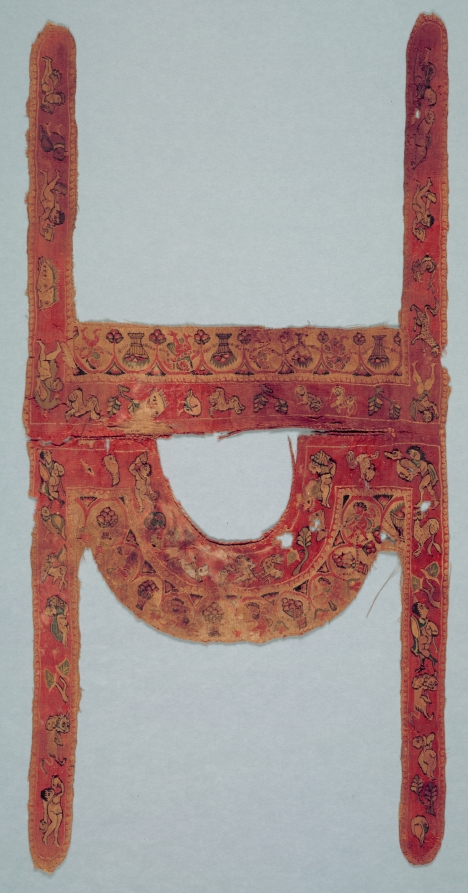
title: Fragment from a Child's Tunic: Neck Opening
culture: Egypt, Umayyad period (661–750)?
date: 600s–700s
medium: Wool and linen: tabby weave, inwoven tapestry ornament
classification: Textile